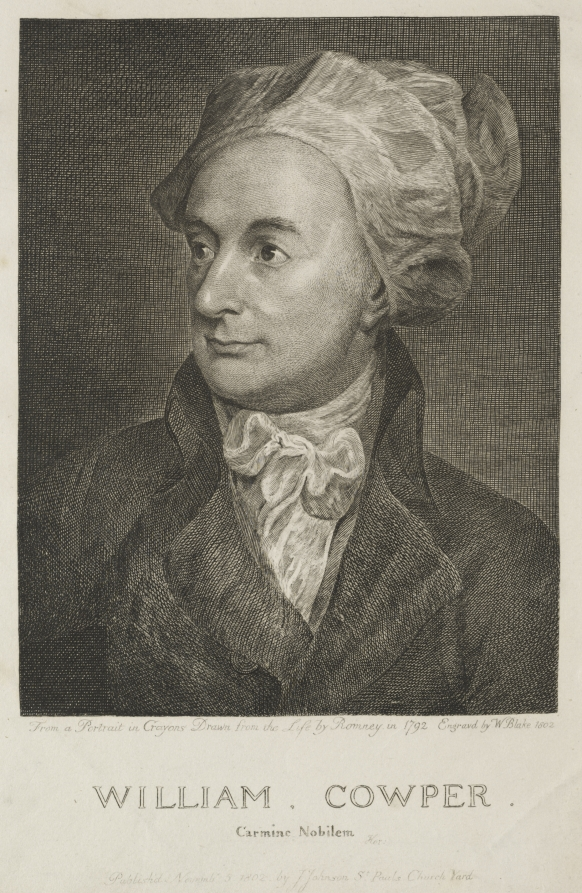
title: William Cowper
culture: England, early 19th Century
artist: William Blake (British, 1757–1827)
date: 1802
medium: engraving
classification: Print